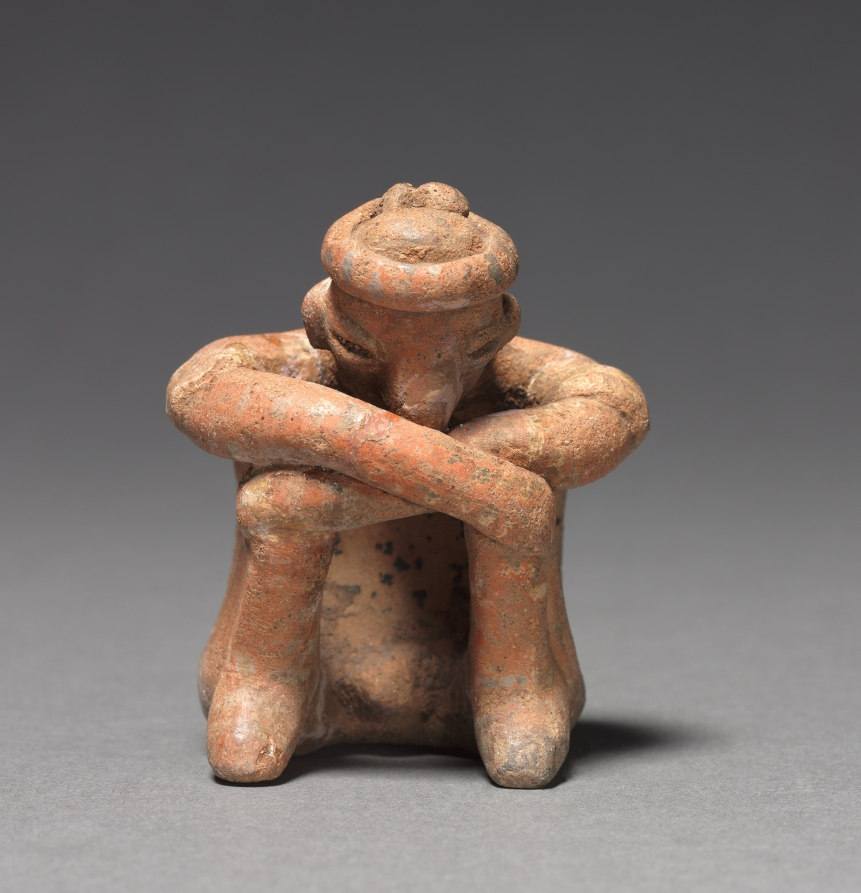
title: Seated Male Figurine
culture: Mesoamerica, Veracruz, Remojadas Style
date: 500–900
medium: ceramic, pigment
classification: Sculpture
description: Clay figurines were the earliest and most common art form in Mexico and other countries in the ancient Mesoamerican (Middle American) culture region. Made first by hand and later with molds, most figurines belong to the traditions of commoners, such as farmers, rather than those of elites.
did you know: Clay figurines were the earliest, most common art form in the ancient Mesoamerican culture region.